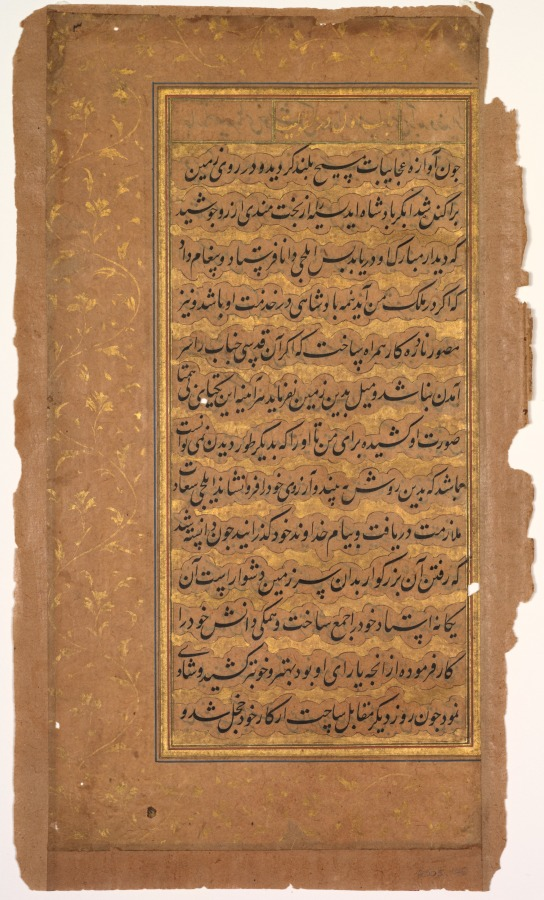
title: Illuminated opening page (folio 1 verso) and 131 folios with Persian text, from a Mirror of Holiness (Mir’at al-quds) of Father Jerome Xavier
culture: Mughal India, Allahabad, made for Prince Salim (1569–1627)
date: 1602–4; margins added with rebinding, about 1900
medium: Gum tempera, ink, and gold on paper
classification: Manuscript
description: The opening page of this Christian manuscript is ornamented in the manner of books made for elite Islamic patrons. Using costly pigments made from the semiprecious blue stone called lapis lazuli and gold paint, the artists created contrasting ground colors to set off delicate floral arabesques that evoke the waters and light of paradise. The text was written in Persian, the official court language of the Mughal rulers in India, and read from right to left. Father Jerome had studied Persian in India for seven to eight years before Akbar asked him to produce a history of the life of Jesus in Persian.